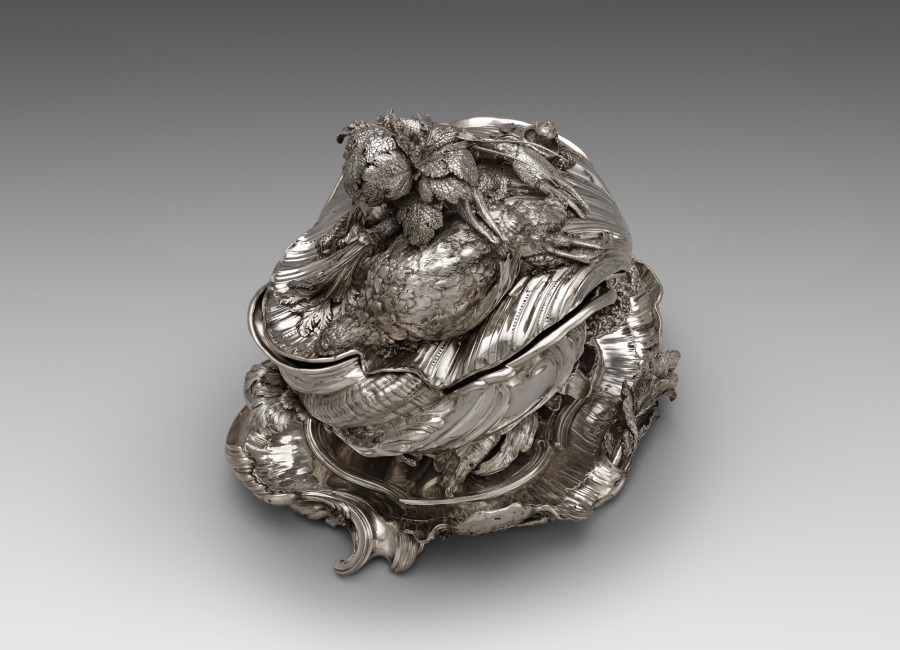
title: Covered Tureen on Stand (Pot-à-oille)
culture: France, Paris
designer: Juste-Aurèle Meissonnier (French, 1695–1750)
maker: Pierre-François Bonnestrenne (French)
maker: Henry Adnet (French, 1745)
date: 1735–38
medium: silver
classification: Silver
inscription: [Maker’s mark of Pierre−François Bonnestrenne, beneath platter; inside tureen (two marks)]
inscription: [Warden's mark for Paris, 1734−1735, beneath platter; inside tureen; inside cover]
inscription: [Charge mark of Hubert Louvet, Paris, 1732-1738, on platter border; beneath platter; beneath tureen; inside cover; inside tureen (two marks)]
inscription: [Discharge mark of Louis Robin mostly used for stamping small work, Paris 1738−1744, on platter border; beneath tureen]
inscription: [Warden's mark for Paris, 1736−1737, on platter border]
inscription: [Possibly British import mark, London, 1925, on platter border]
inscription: [Possibly mark of the British firm Charles & Richard Comyns, on platter border]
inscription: [Discharge of Louis Robin mostly used for stamping gold and silver between 1738 and 1744, beneath tureen; outside cover]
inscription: [Maker’s mark of Henry-Guillaume Adnet, inside cover]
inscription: [Two small undefined marks, inside cover]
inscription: [Under the surface of the platter the engraved signature]: “FAIT-PAR-I-A-MEISSONIER-ARCHITECTTE”; [and the weight] “673=5"; “No. [v] I 50 £ b76Sol”; [and the numbers] “A nº 1”; “A nº2”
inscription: [On tureen lip]: "MEISSONIER"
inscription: [On tureen lip]: “A nº 3”; “A nº2” [in order to place the tureen correctly on the stand]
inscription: [Numbers engraved on the stand, the tureen, and the cover to show how the piece should be assembled]: “A nº 1” [on the base of the tureen; beneath the cover; on the platter], “A nº 2” [on the platter], “A nº 3” [on the exterior rim of the tureen], “A nº4”; “A nº 5” [outside the cover], “A nº 7” [on the border of the platter]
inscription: [Two warden's marks for Paris, 1735-1736, beneath tureen]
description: This tureen exemplifies the French Rococo style, an artistic movement celebrating naturalistic forms that developed in Paris during the early 1700s. In contrast to classical, controlled symmetry, Rococo forms morph, twist, and spill into the space around them. Meissonnier embellished this tureen in a picturesque arrangement of vegetables and creatures, transforming a utilitarian object into a decadent display of wealth and abundance. This masterpiece comes from a set of two tureens commissioned by the English Duke of Kingston during an extended stay in Paris in the 1730s.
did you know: The langoustine, pigeon, and vegetables were cast using real examples giving the silver copies lifelike detail and appearance.